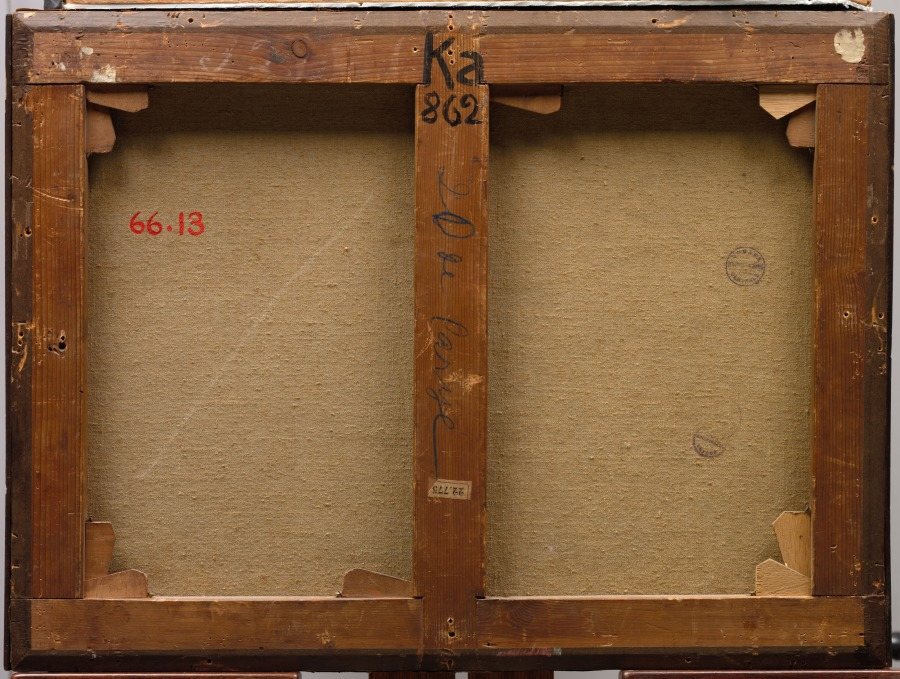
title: Antiochus and Stratonice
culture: France, 19th century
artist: Jean-Auguste-Dominique Ingres (French, 1780–1867)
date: c. 1838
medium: oil on linen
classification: Painting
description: Struck by a mysterious illness, Antiochus lies in bed near death. His grieving father, who has recently taken Stratonice as his wife, summons a doctor. Noticing that the sight of the young woman quickens Antiochus’s pulse and that passion causes his sickness, the doctor describes the youth’s predicament to his father, who selflessly offers Stratonice to his son. The subject, both a love story and an example of parental devotion, enjoyed considerable popularity well into the 1800s.